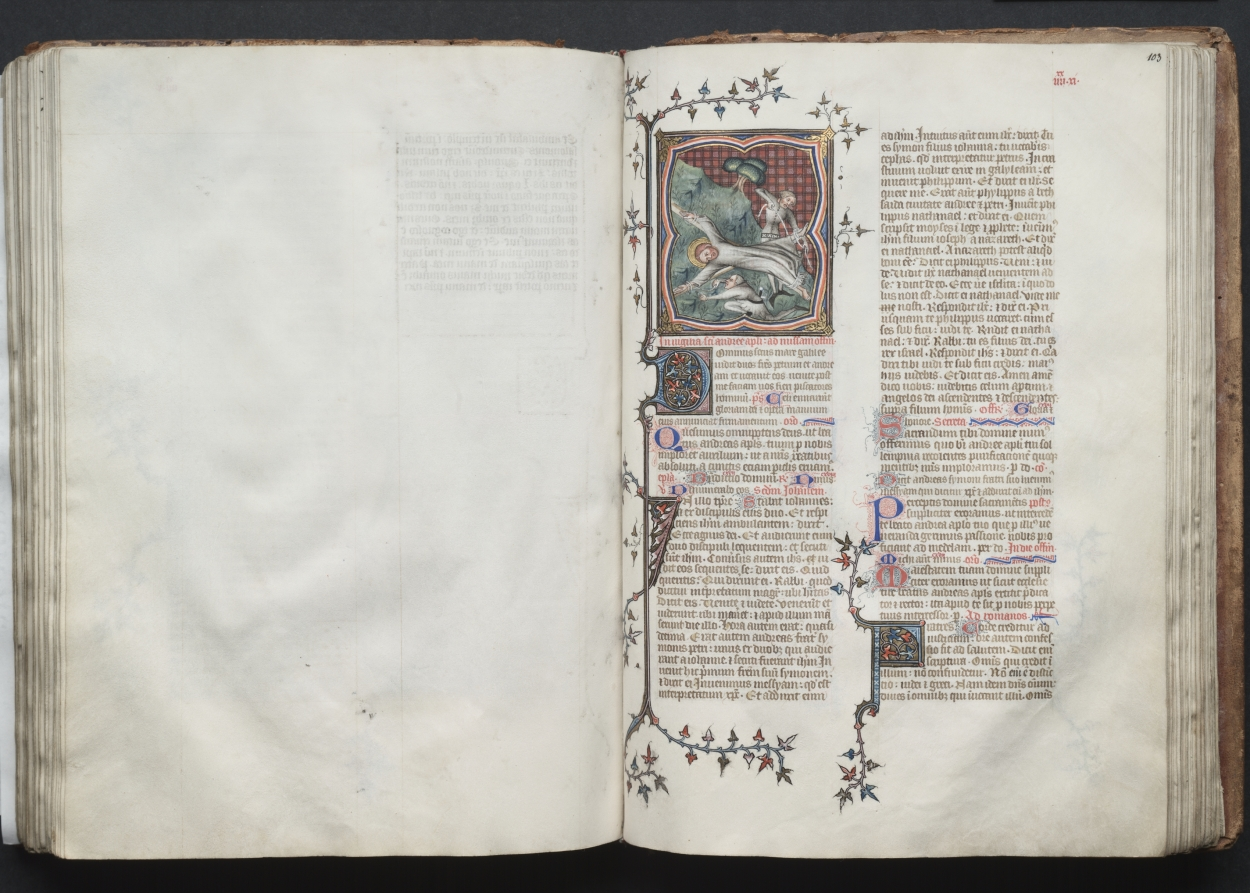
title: The Gotha Missal: Fol. 102v, Text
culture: France, Paris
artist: Master of the Boqueteaux (French)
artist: and Workshop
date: c. 1375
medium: ink, tempera, and gold on vellum; blind-tooled leather binding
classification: Bound Volume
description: The style and quality of this manuscript's decoration is typical of deluxe Parisian books made for aristocratic or royal patrons. Most of the book's decoration appears to be the work of the Master of the Boqueteaux, an artist active at the court of King Charles V (died 1380). His style was apparently shared by a number of book illuminators working in and around Paris. It is very possible that the Gotha Missal belonged to Charles V, but is not provable because the manuscript has no royal portraits and lacks a colophon. Given the book's magnificent decoration, however, it would seem that it was produced for a Valois prince, if not for the king himself. The manuscript receives its name from the German dukes of Gotha, its later owners.